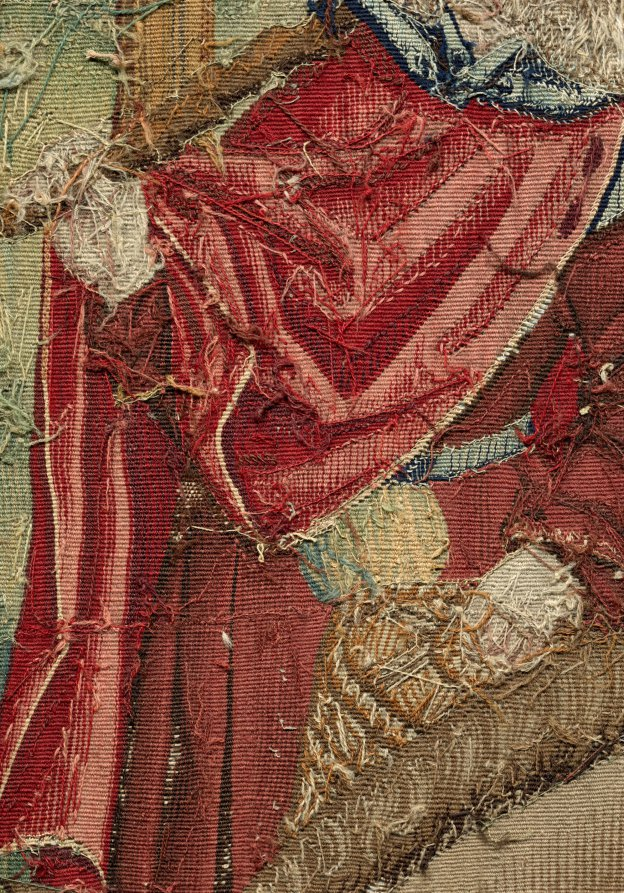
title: Altar Frontal: Scenes from the Childhood of Christ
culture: France and South Netherlands, 1500s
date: c. 1500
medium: Wool, silk, gold thread; tapestry weave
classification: Tapestry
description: Pictorial tapestries were symbols of wealth and more highly prized than paintings. Small tapestries with Christian imagery were frequently commissioned to embellish the fronts of altars. This example displays the Massacre of the Innocents, the Flight into Egypt, and Christ among the Doctors. Tapestry weave is ideal for creating narrative scenes. The technique can be compared to painting, as each colored weft (horizontal thread) is interlaced with warps (vertical thread) where needed for the pattern. As expensive investments, tapestries have the advantage of being portable and easily stored and displayed.